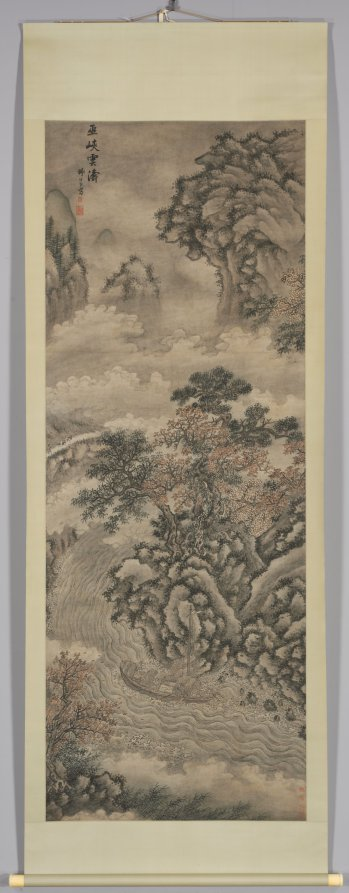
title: Clouds and Waves at the Wu Gorge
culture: China, Ming dynasty (1368–1644)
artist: Xie Shichen (Chinese, 1487–after 1567)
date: c. 1547–67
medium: hanging scroll; ink and light color on paper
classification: Painting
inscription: "巫峽雲濤" 謝時臣寫 [印] 姑蘇台下逸人; 樗仙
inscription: 5 additional seals of Cheng Qi 程琦 (1911–1988).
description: This dramatic landscape was probably painted after Xie Shichen returned from a journey in 1547 that took him through various provinces of China, including Sichuan Province in southwest China and sailing the Yangzi River. The composition from a high vantage point offers a view deep into the Wu Gorge where rolling waves put a ship in peril. The scale and composition of this landscape, which was inspired by the majestic mountain scenery in Sichuan Province, as well as Xie’s vigorous brushwork, are exceptional.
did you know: This large painting was likely created for a wealthy or powerful family's grand hall to impress their visitors.